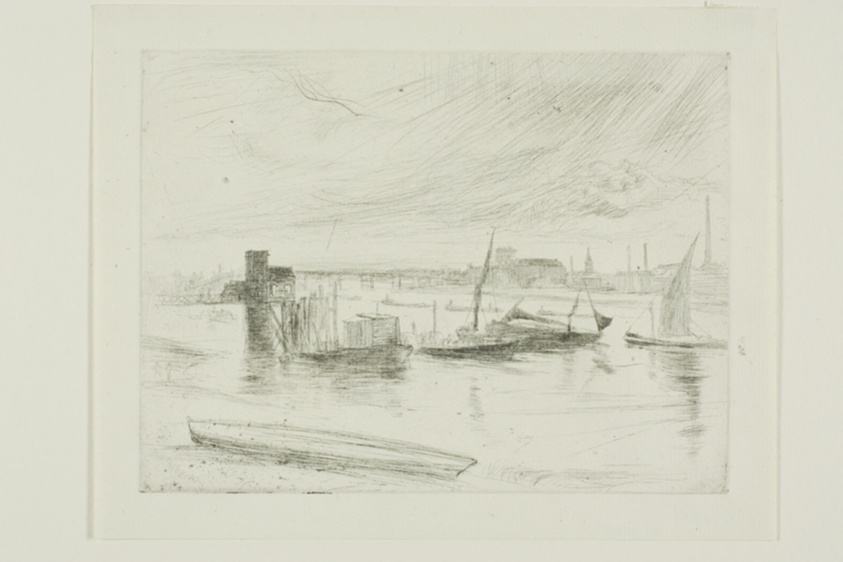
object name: Print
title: Battersea Dawn (Cadogan Pier)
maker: James McNeill Whistler (American, 1834-1903)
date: 1863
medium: Etching and drypoint with foul biting in black ink on ivory laid paper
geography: United States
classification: etching; foul biting; print; prints and drawing; drypoint; paper